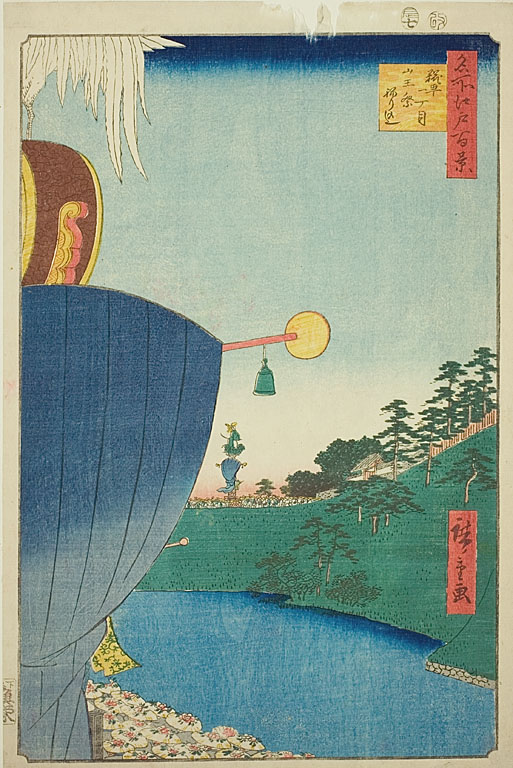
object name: Print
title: Sanno Festival Procession at Kojimachi Itchome (Kojimachi Itchome Sanno Matsuri nerikomi), No.51 from the series “One Hundred Famous Views of Edo (Meisho Edo hyakkei)”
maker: Utagawa Hiroshige (Japanese, 1797-1858)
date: 1856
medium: Color woodblock print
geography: Japan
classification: woodblock print; print; asian art